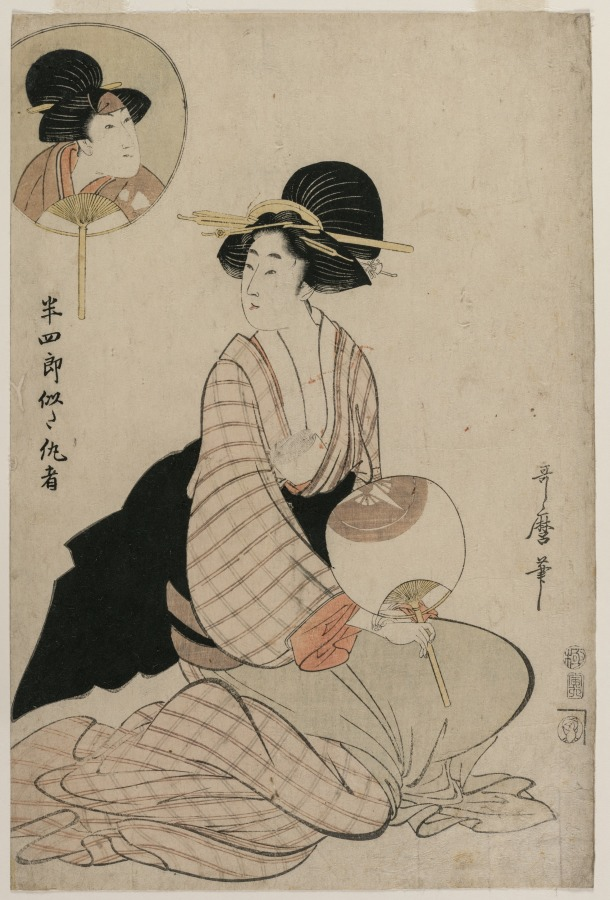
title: An Attractive Woman Who Looks Like the Actor Iwai Hanshiro V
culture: Japan, Edo period (1615–1868)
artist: Kitagawa Utamaro (Japanese, c. 1754–1806)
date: 1806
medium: color woodblock print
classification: Print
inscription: Signature: Utamaro hitsu Publisher: Tsuruya Kinsuke (emblem) Censorship Seal: kiwame